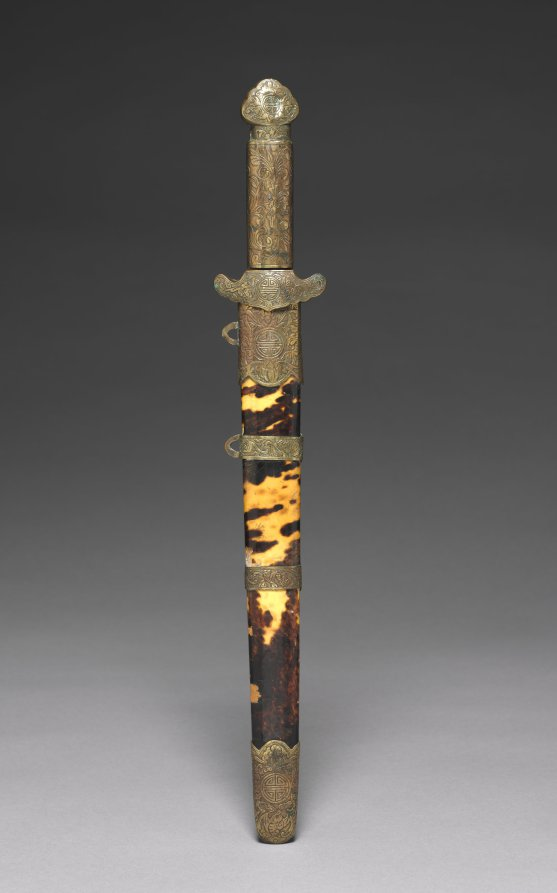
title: Dagger and Scabbard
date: 1800s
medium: metal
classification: Arms and Armor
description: This is a typical 19th-century dagger and scabbard. The material and decoration were carefully chosen for their symbolic meaning. For example, tortoise shell was chosen as the main material for the scabbard for its association with the legend of ancient heroes, while bats, the main decorative element of the brass mount, symbolize longevity and happiness.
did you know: In traditional East Asian art, bats, used here as a decorative element of the brass mount, symbolize longevity and happiness.